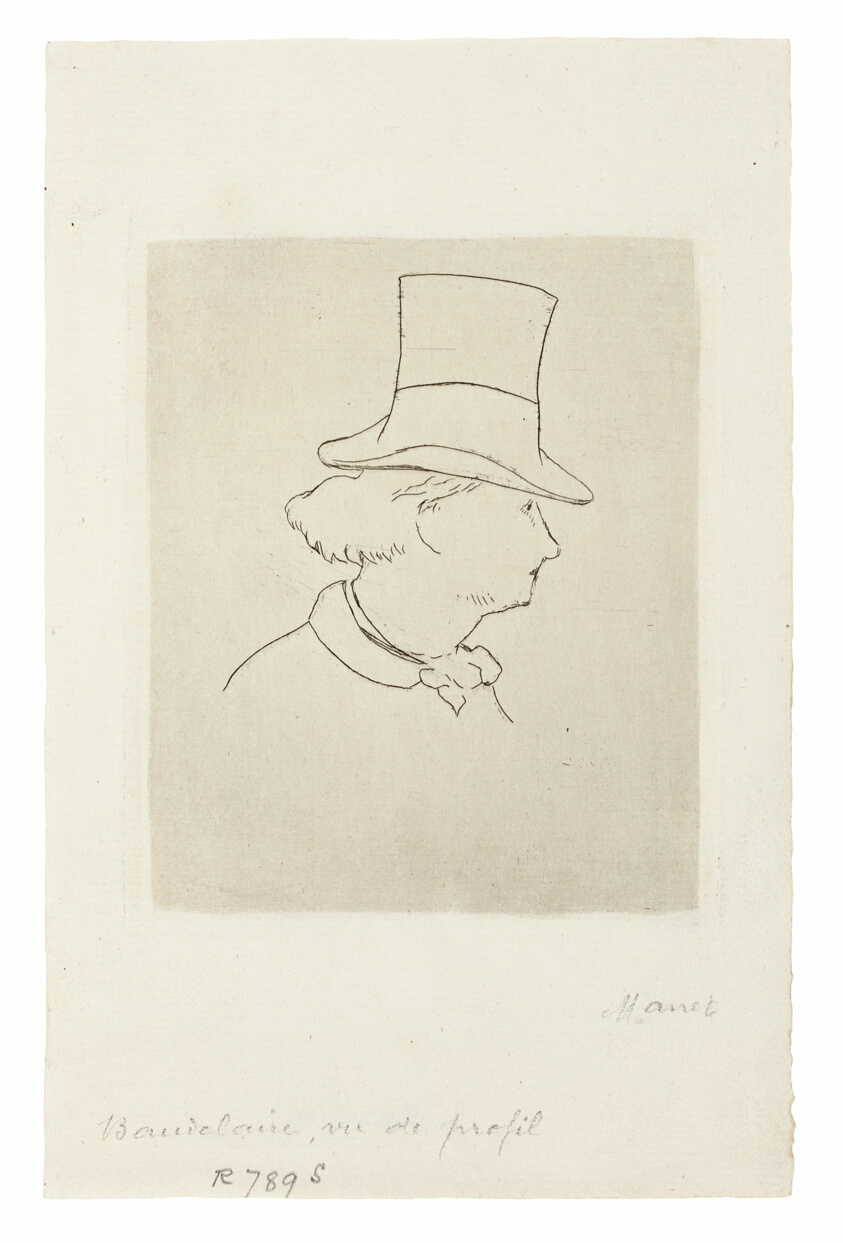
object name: Print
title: Charles Baudelaire, In Profile II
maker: Édouard Manet (French, 1832-1883)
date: 1867–68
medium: Etching and plate tone in black on ivory laid paper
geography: France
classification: etching; print; prints and drawing